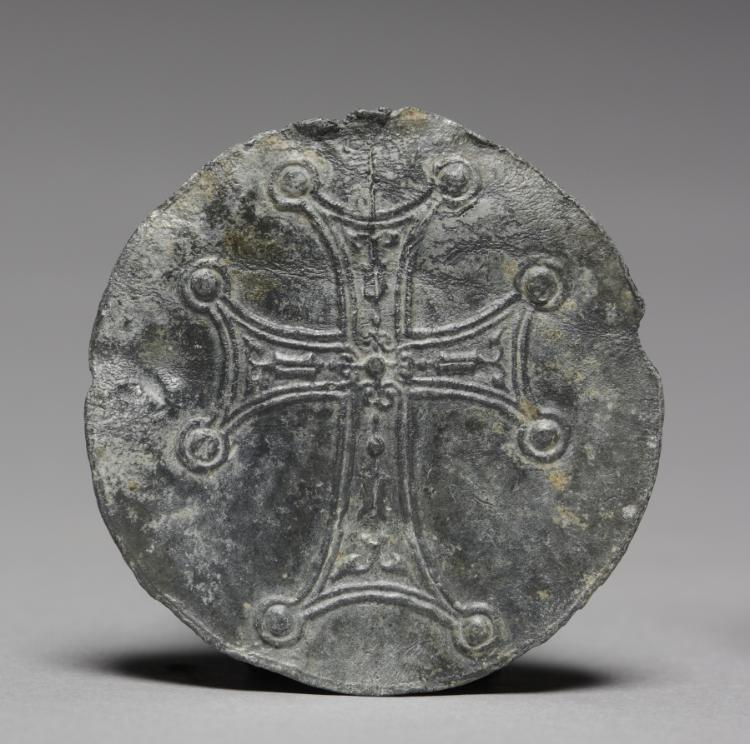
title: Pilgrim's Medallion with St. Symeon the Younger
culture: Byzantium, Syria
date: c. 1100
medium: lead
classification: Metalwork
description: Saint Symeon the Younger was a stylite saint, an early Christian ascetic who fled the world for the desert and, perched on a column, spent his days fasting and praying. The site of Symeon’s column attracted many pilgrims during and after his lifetime. Medallions like this one, showing Symeon atop his column on one side and a cross on the other, were taken home by pilgrims in commemoration of their visit and were believed to serve their owners as protective talismans.